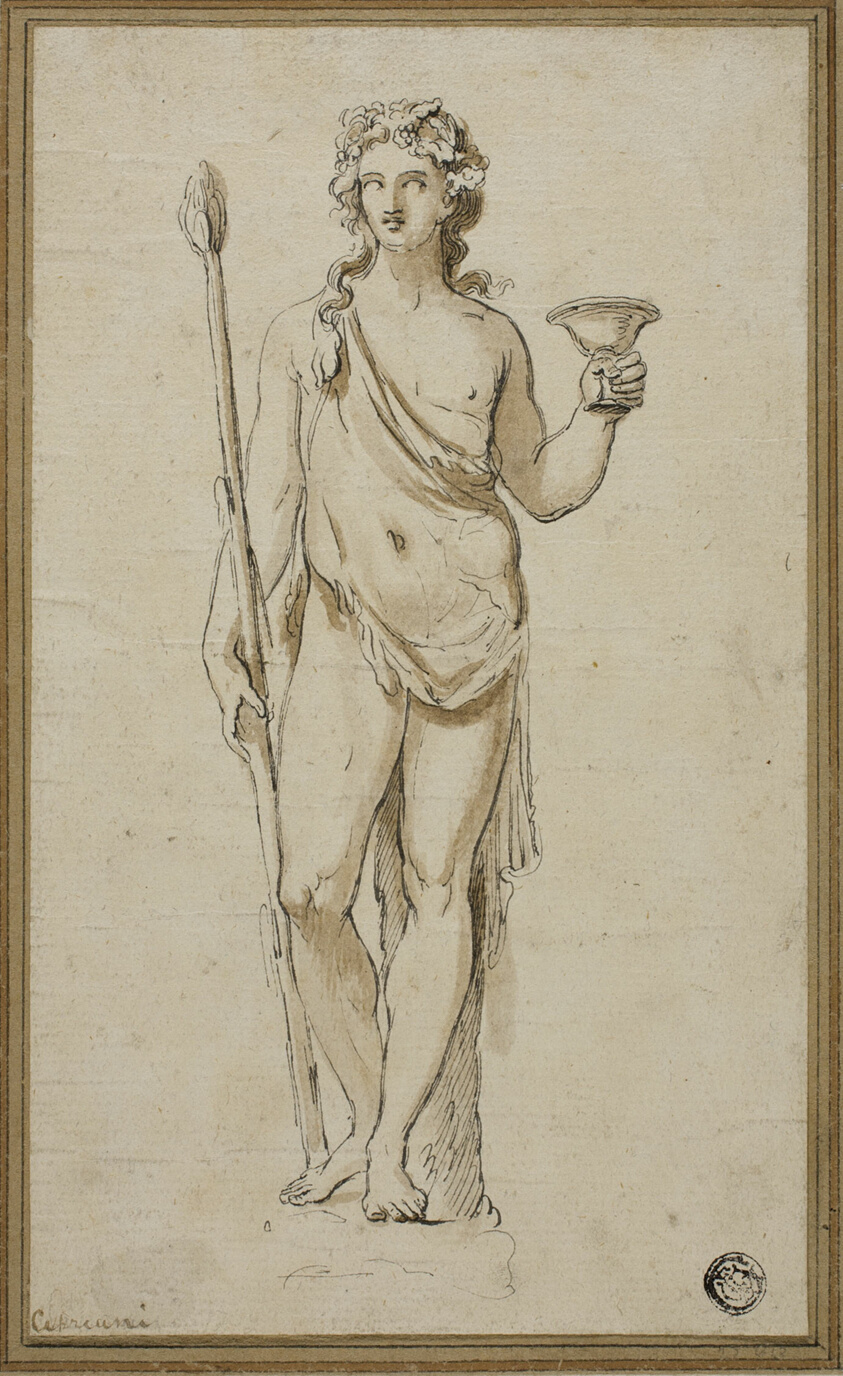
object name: Drawing and Watercolor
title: Bacchus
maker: Attributed to Giovanni Battista Cipriani; Italian, 1727-1785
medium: Pen and black ink with brush and brown wash, on cream laid paper, laid down on brown laid paper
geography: Italy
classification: pen and ink drawings; drawings (visual works); prints and drawing